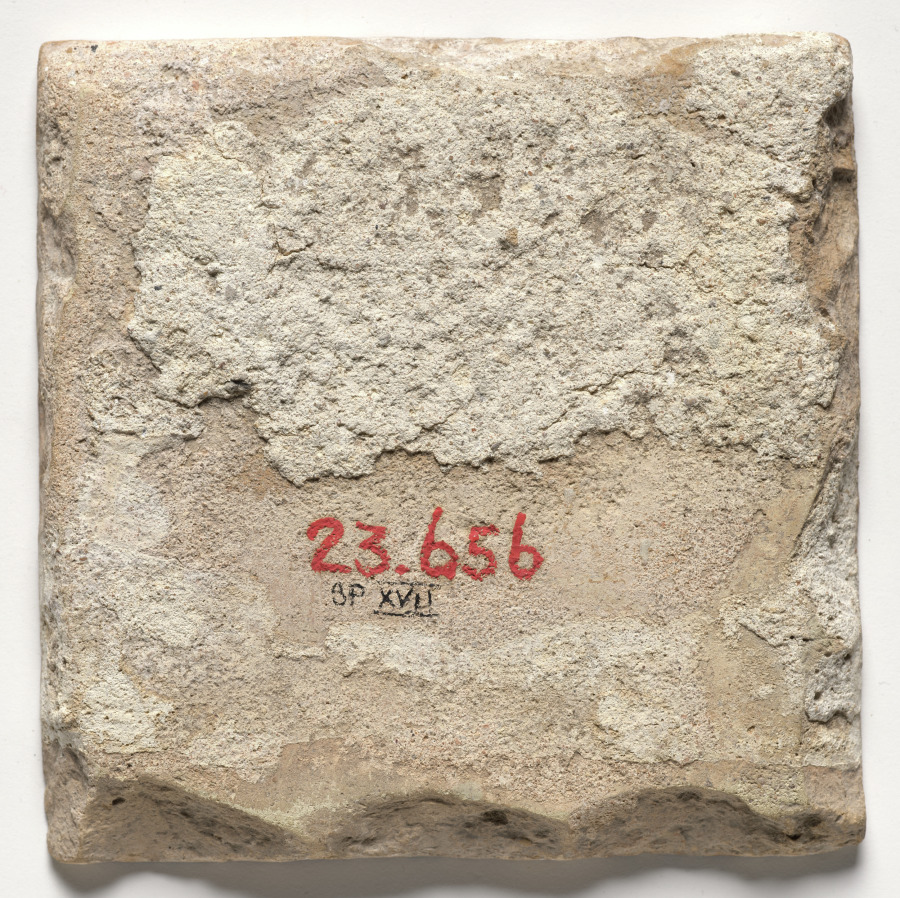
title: Wall Tile–Female Bust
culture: Spain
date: c. 1600s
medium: glazed ceramic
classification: Ceramic